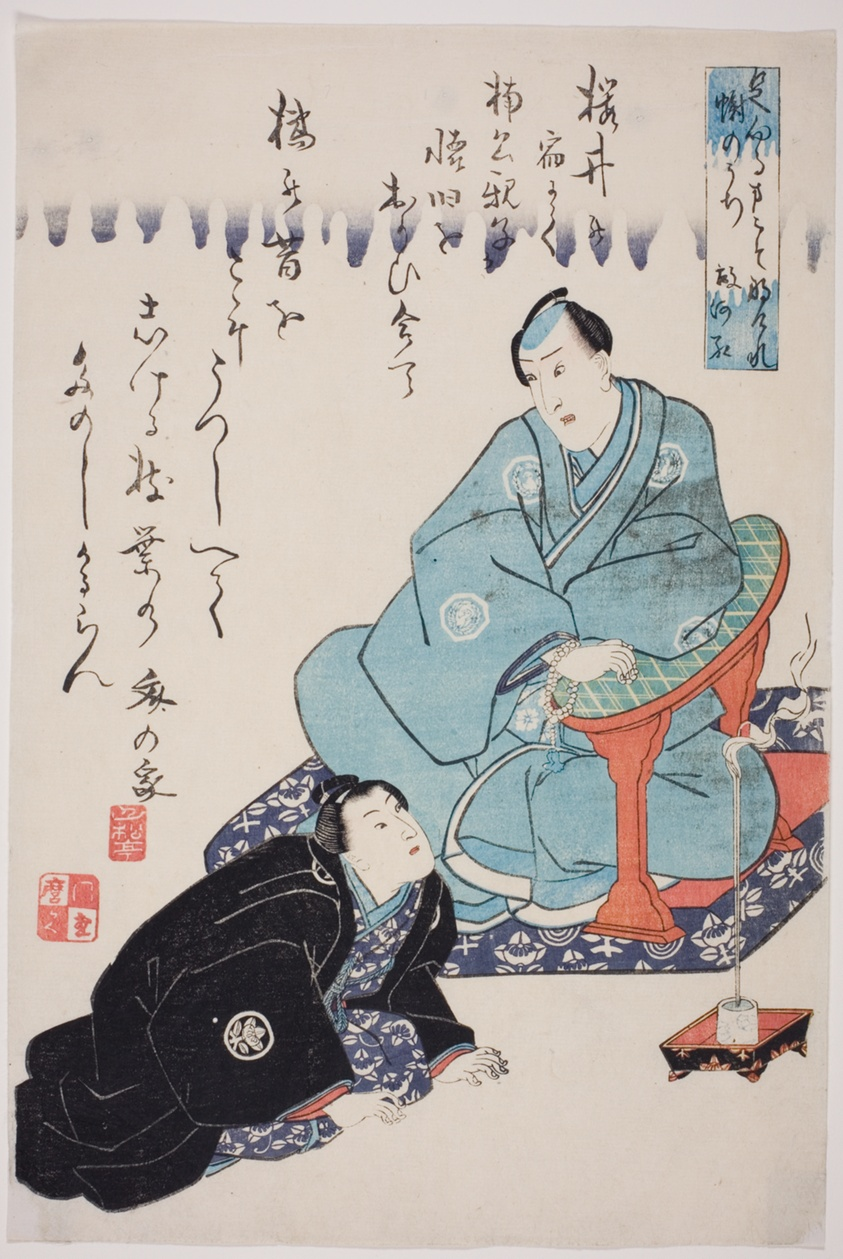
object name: Print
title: Memorial Portraits of Ichimura Takenojo V and Unidentified Actor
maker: Utagawa Kunimaro I (Japanese, active c. 1850-75)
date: 1851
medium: Color woodblock print; oban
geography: Japan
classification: print; asian art